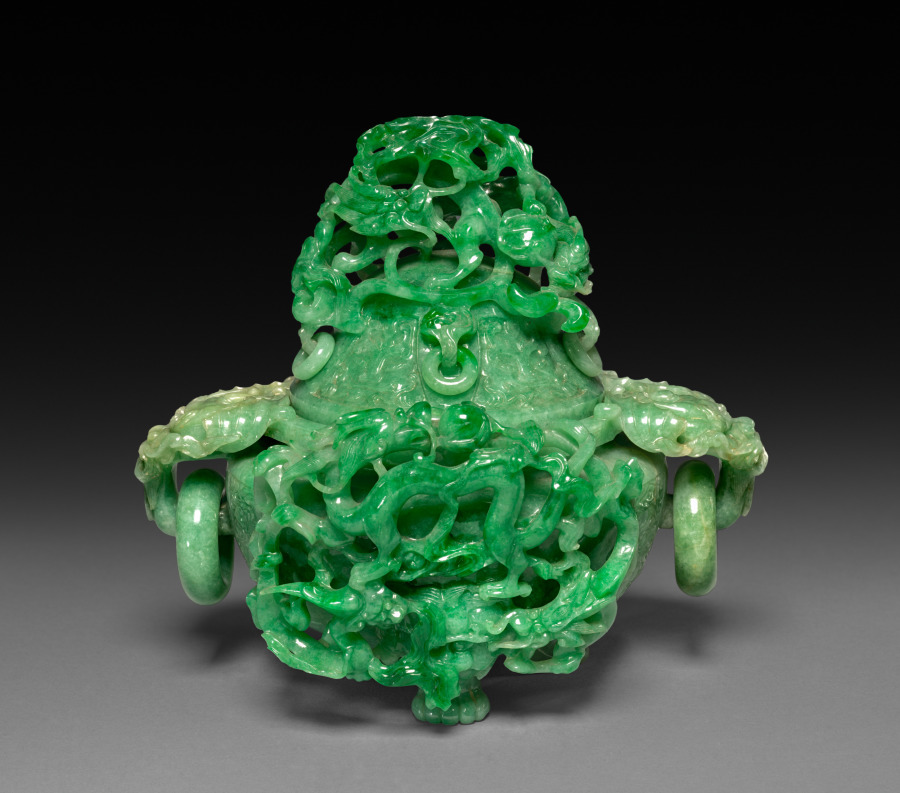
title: Three-Sectional Altar Group: Koro with Lid and Base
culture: China, Qing dynasty (1644-1911)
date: 1644–1911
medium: jade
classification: Jade